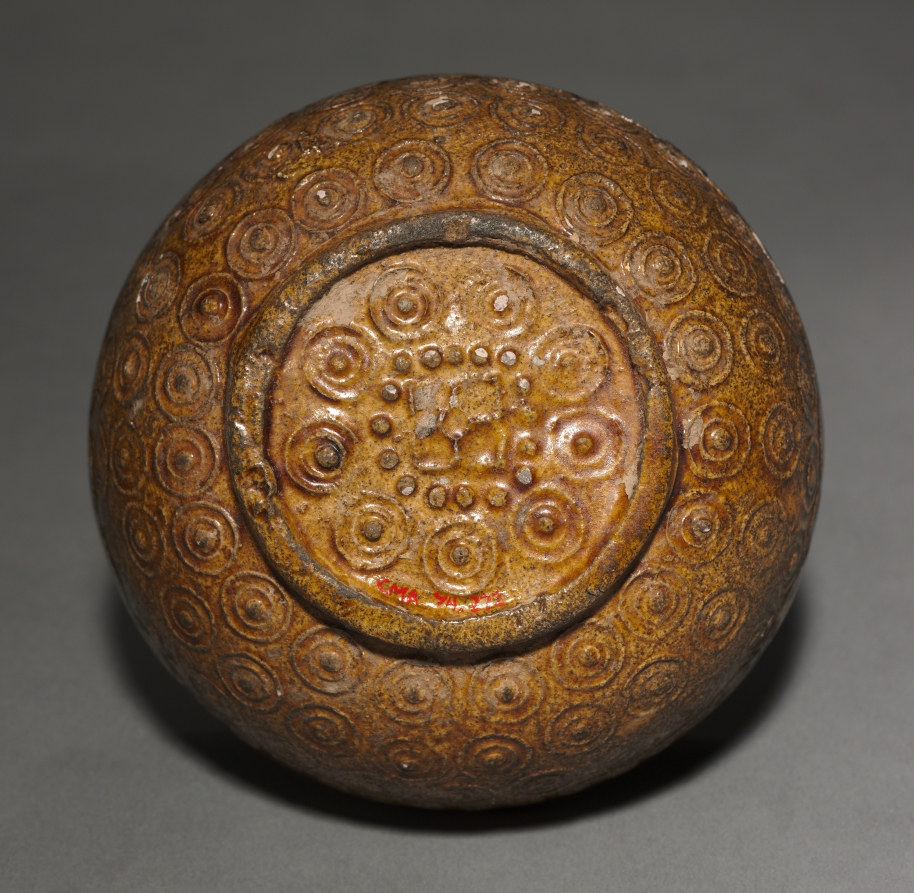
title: Bowl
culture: China, Tang dynasty (618-907)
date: 618–906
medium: glazed earthenware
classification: Ceramic